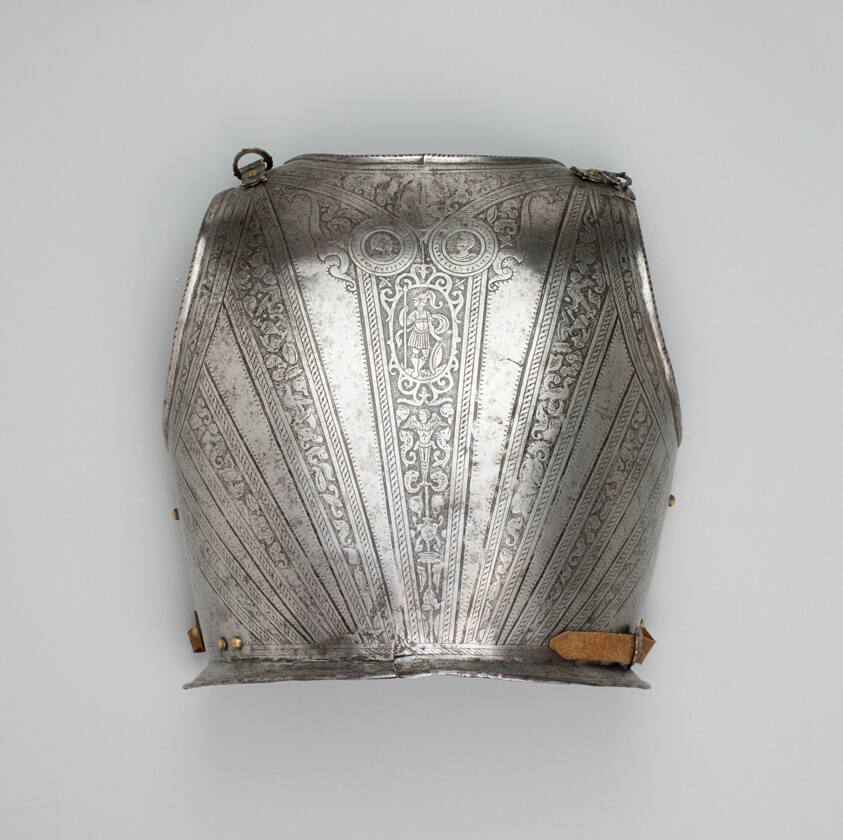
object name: Armor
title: Backplate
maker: Northern Italian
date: c. 1590/1600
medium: Steel, etched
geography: Northern Italy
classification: suit-element; armor; arms and armor